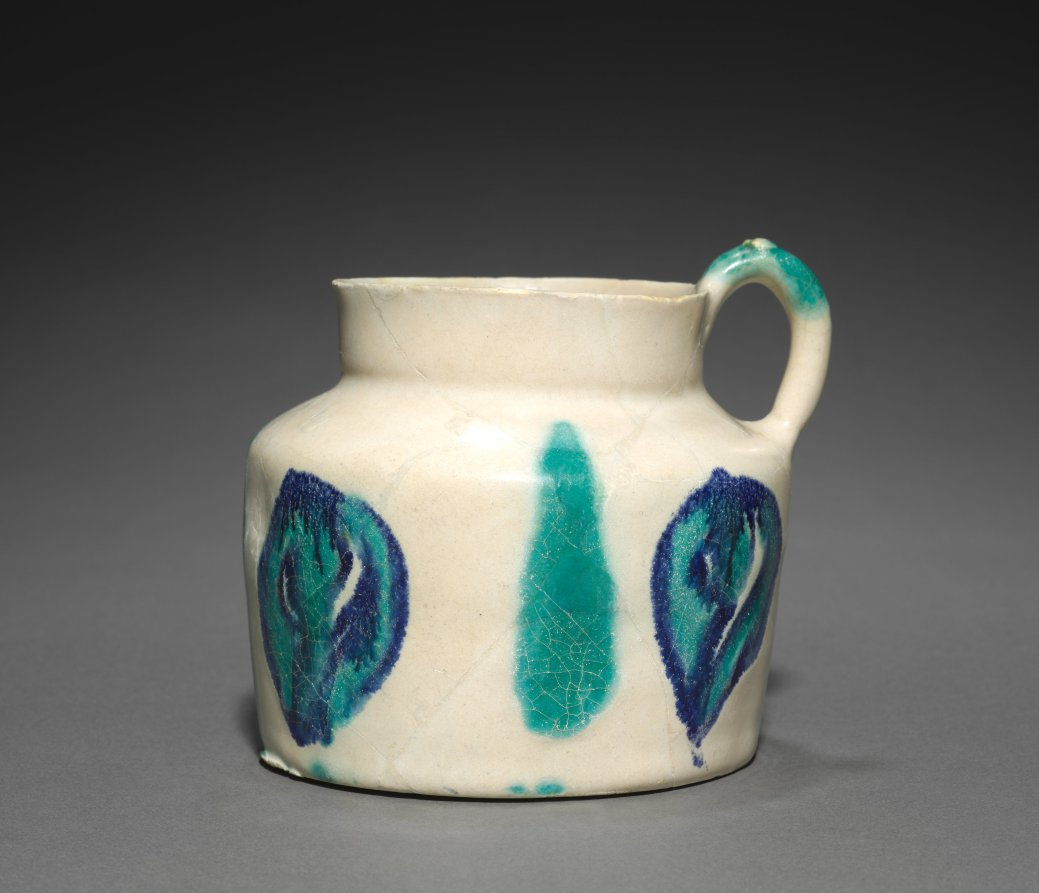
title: Earthenware Jug painted with Blue and Turquoise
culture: Iraq, Basra, Abbasid Period, 9th century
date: 800s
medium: earthenware with overglaze-painted design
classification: Ceramic